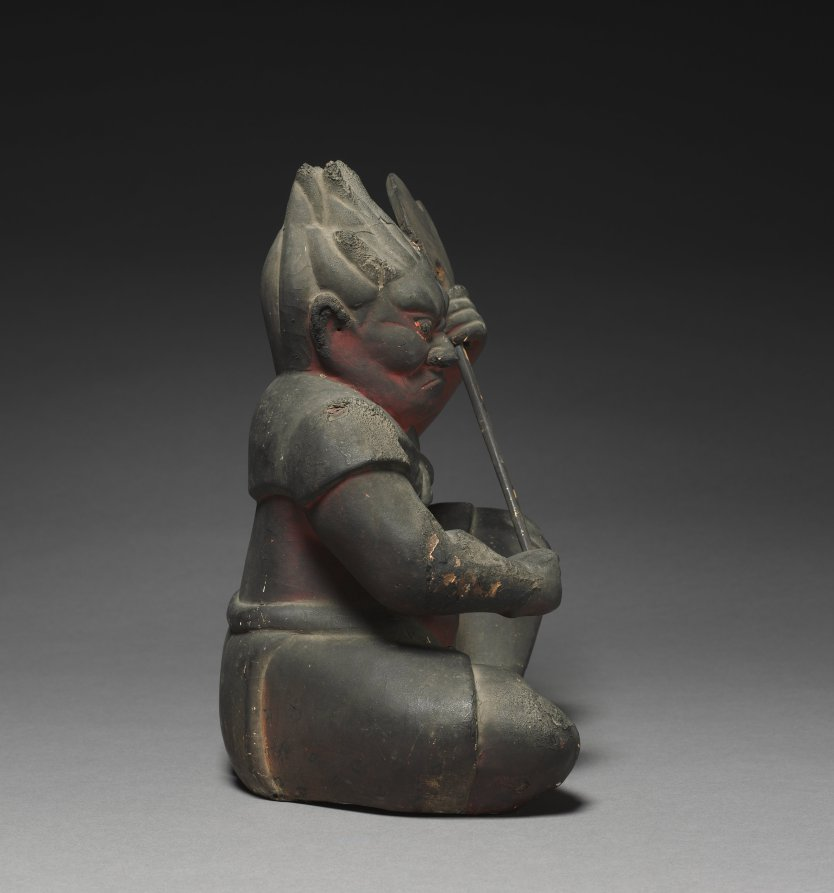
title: Seated Zenki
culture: Japan, Muromachi period (1392–1573)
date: 1400s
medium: wood with pigment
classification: Sculpture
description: The axe-wielding red Zenki, and the vase-holding, bamboo backpack-wearing green Koki are both under the mystical control of the monk, En no Ozunu (legendarily 634–701), also known as En no Gyōja, or “En the Ascetic,” considered to have founded Shugendō, a style of religious practice focused on performing austerities in mountainous settings.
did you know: A popular Japanese comic named Zenki was inspired by the figure seen here wielding a weapon.